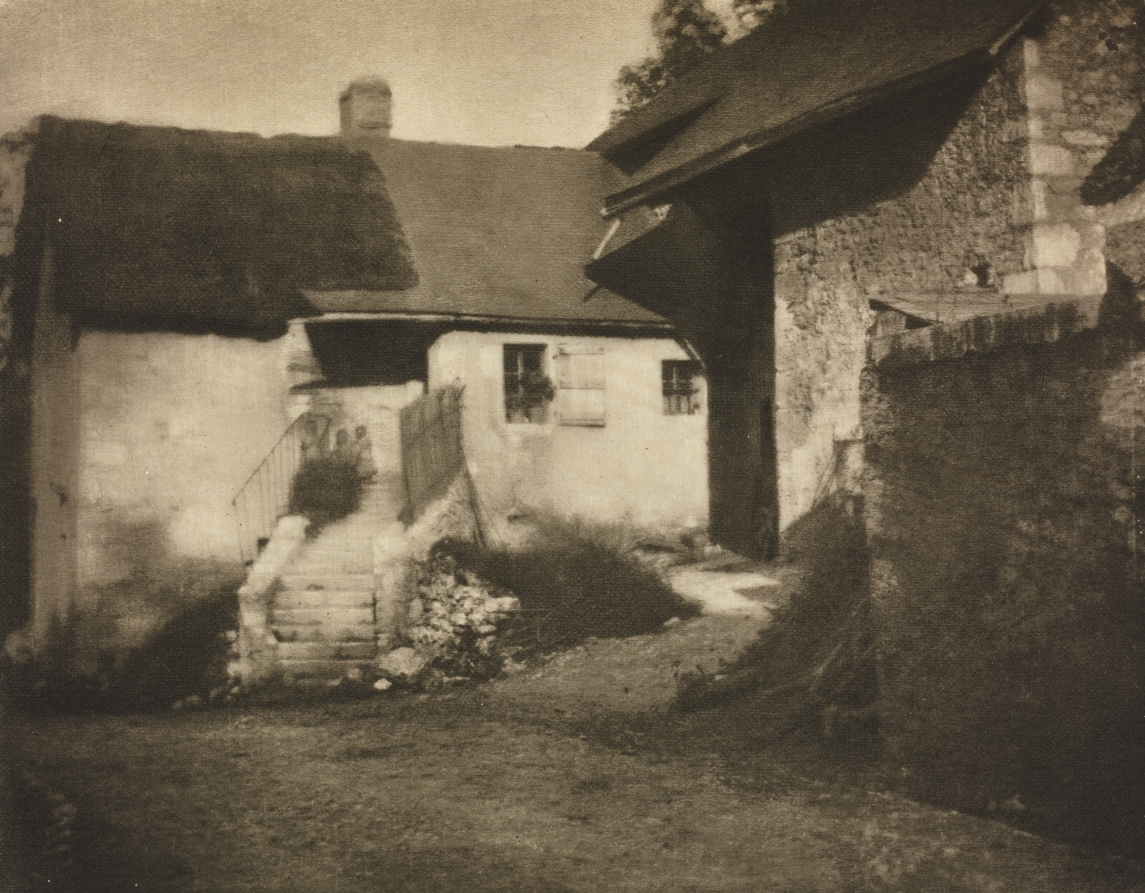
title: Camera Work: Houses Near Aix-les-Bains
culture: England, 20th century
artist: George Davison (British, 1856–1930)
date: 1909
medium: photogravure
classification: Bound Volume